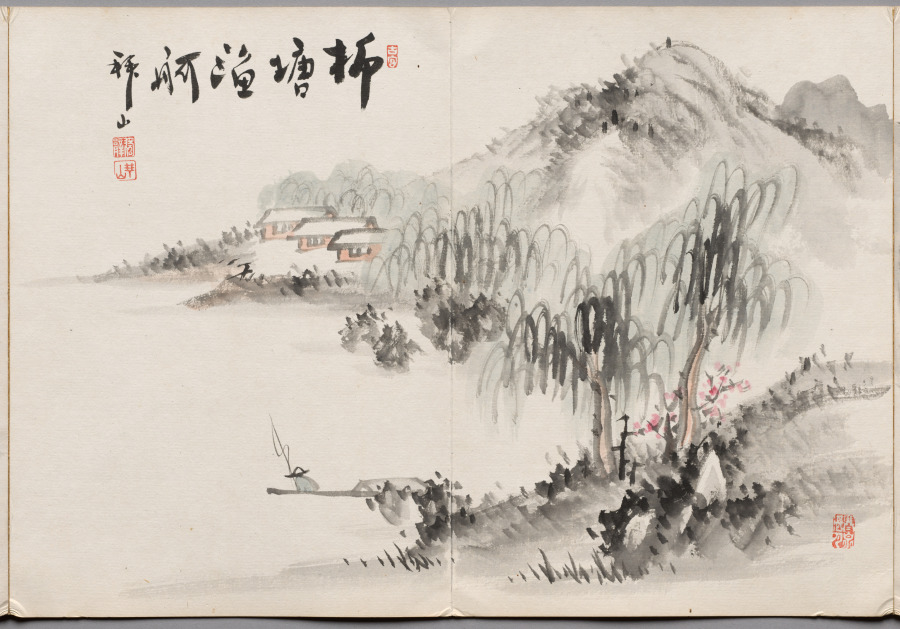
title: Painting Four from Album of Paintings by Haizan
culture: Japan, Meiji period (1868–1912) or Taishō period (1912–26)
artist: Yoshitsugu Haizan (Japanese, 1846–1915)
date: late 1800s–early 1900s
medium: page spread from double-sided accordion album; ink and color on paper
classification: Painting